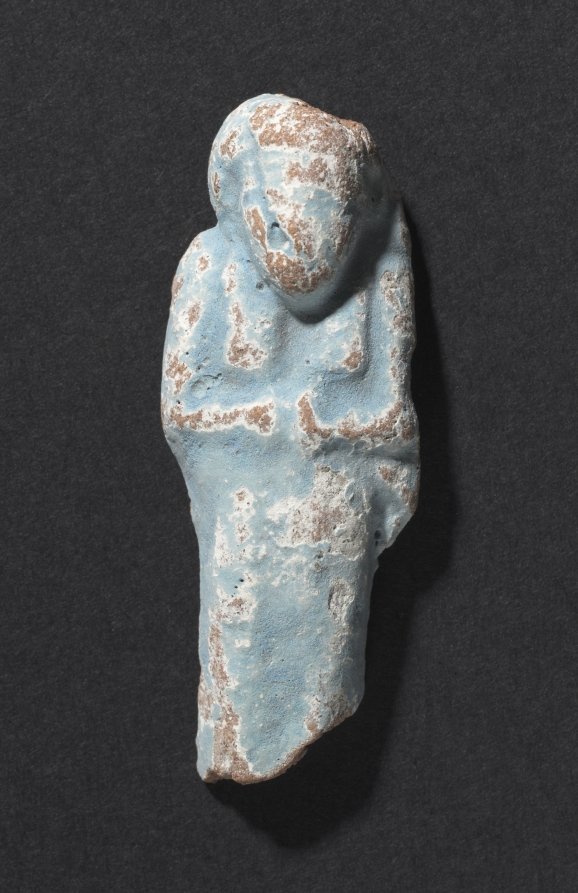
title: Shawabty of Ditamenpaankh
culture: Egypt, Late period (715–332 BCE), Dynasty 25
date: 715–656 BCE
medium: terracotta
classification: Funerary Equipment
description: High demand for shawabtys in the Late Period, a time when as many as 400 or more shawabtys were placed in the tomb with the deceased, gave rise to a specialized container for storing them: the shawabty box. This example is inscribed for the lady of the house, Ditamenpaankh, and was probably one of a pair originally made for her. The single-masted boat on the box's lid is perhaps an allusion to the pilgrimage of the deceased to the holy city of Abydos, the cult city of Osiris, king of the dead. The shawabtys inside are crude, mass-produced examples cast in an open mold. Made of terracotta, their blue paint imitates more costly shawabtys made of faience. As for the shawabty spell, it has been removed from its traditional location on the shawabty's front and relocated onto the sides of box, where it needed only to be written once, thus expediting production.